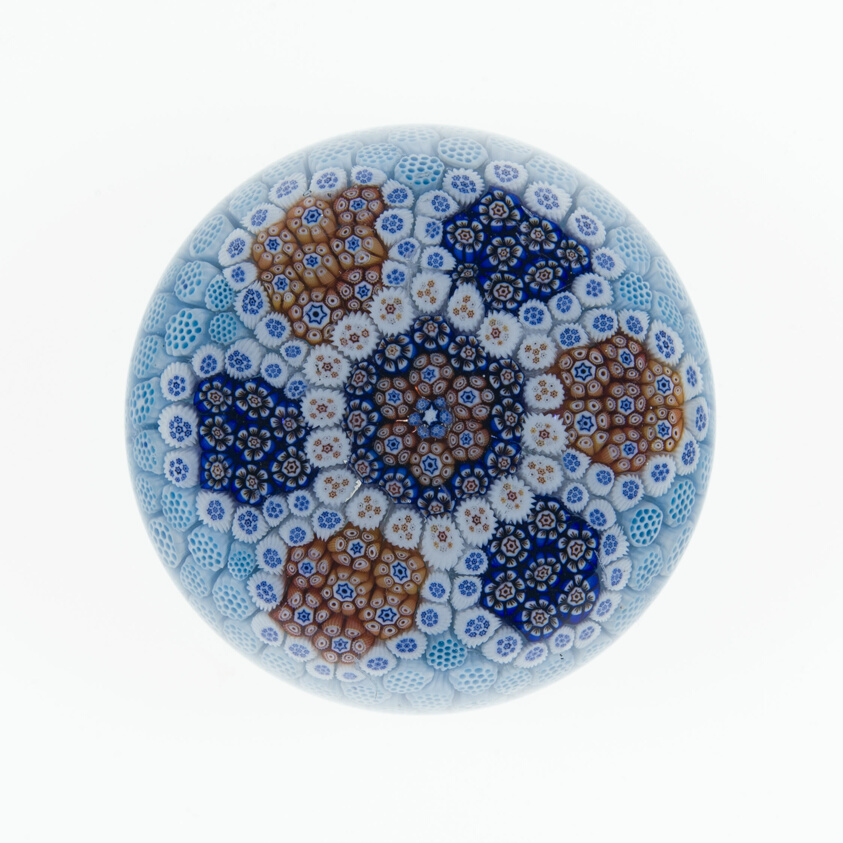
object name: Glass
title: Paperweight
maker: Baccarat Glassworks (Cristalleries de Baccarat); Lorraine, France, founded 1764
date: c. 1846–55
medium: Glass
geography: Lunéville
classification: paperweight; millefiori; european decorative arts; glass